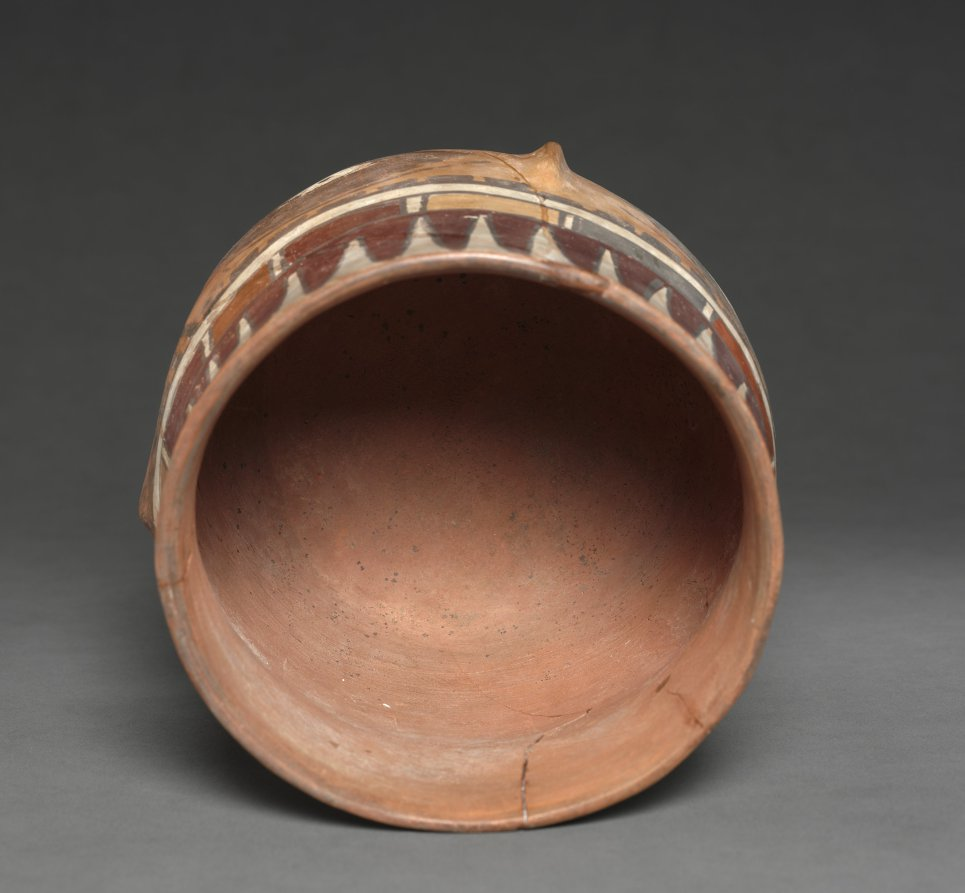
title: Vase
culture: Peru, South Coast, Nasca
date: c. 300–500 CE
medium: pottery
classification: Ceramic